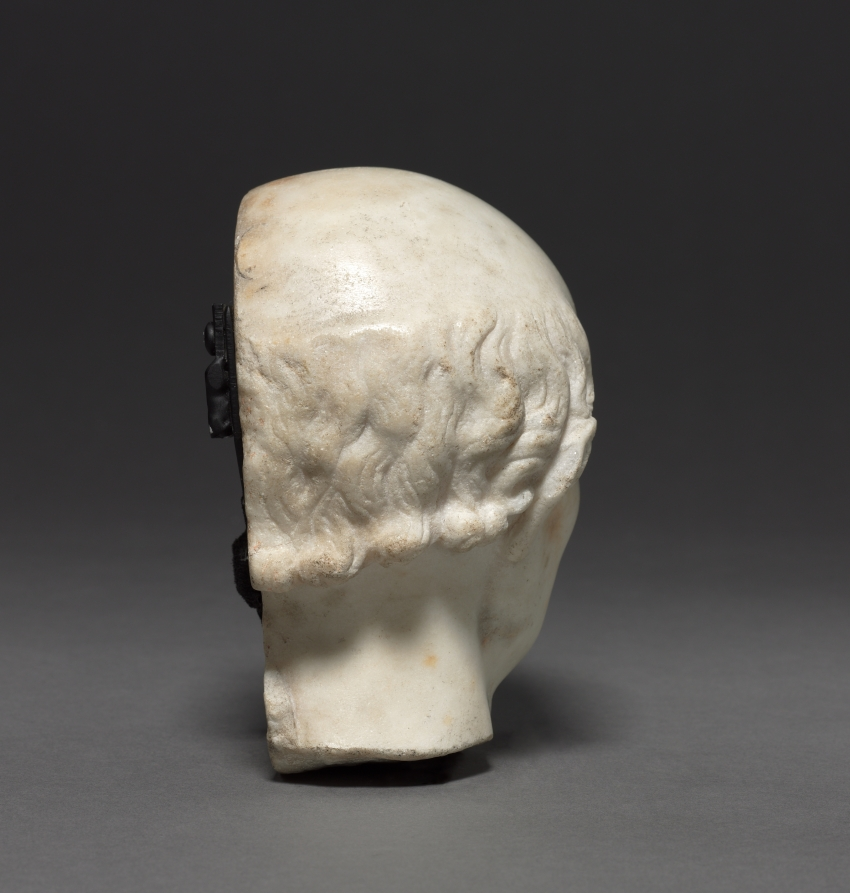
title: Head of a Man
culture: France, 15th century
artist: circle of Michel Colombe (French, c. 1430–c. 1513)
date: 1520–1525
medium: marble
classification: Sculpture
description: The original context and function of these two marble heads are unknown. They are presumed to have been part of a relief sculpture from a château, perhaps in the Loire region, or else from a tomb sculpture. Their style is reminiscent of sculptures produced by Michel Colombe, a prominent sculptor active in the Loire Valley in the service of aristocratic and royal patrons, and may have been carved by a close follower or member of his workshop.